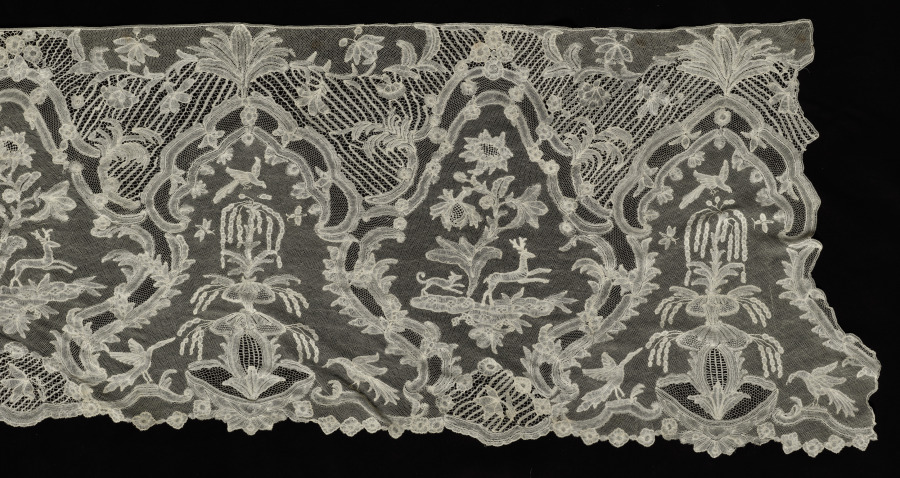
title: Lace Flounce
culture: Belgium, Brabant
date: 1700s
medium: Linen: bobbin lace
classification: Lace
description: This piece of lace depicts fountains alternating with a deer and a dog by a flowering tree.